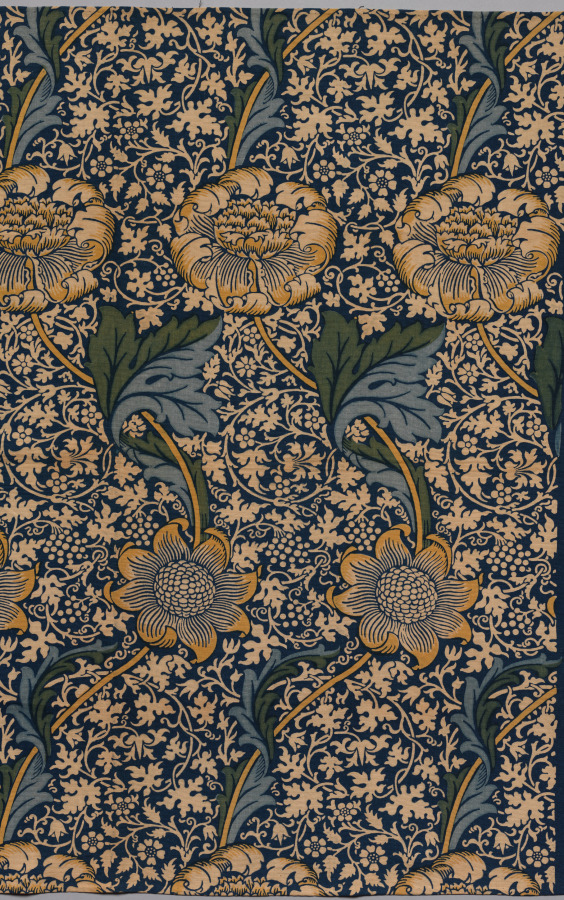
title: Kennet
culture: England, Merton Abbey, 20th century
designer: William Morris (British, 1834–1896)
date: c 1920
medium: plain weave cotton, printed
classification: Textile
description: Morris said that he used the South Kensington Museum (now the Victoria & Albert Museum) more than anyone alive. As one of the most knowledgeable textile historians of his day, Morris filtered his love of nature through the lens of history. Later textiles with strong diagonal orientation, such as Kennet, show a debt to the centuries-old Italian cut velvet that he had studied. Named after a river in the south of England that flows into the Thames, Kennet is an example of one of his patterns that could be purchased in a variety of colors and fabrics, including cotton, velveteen, silk, and Madras muslin, creating limitless possibilities to appeal to consumers’ needs and tastes.